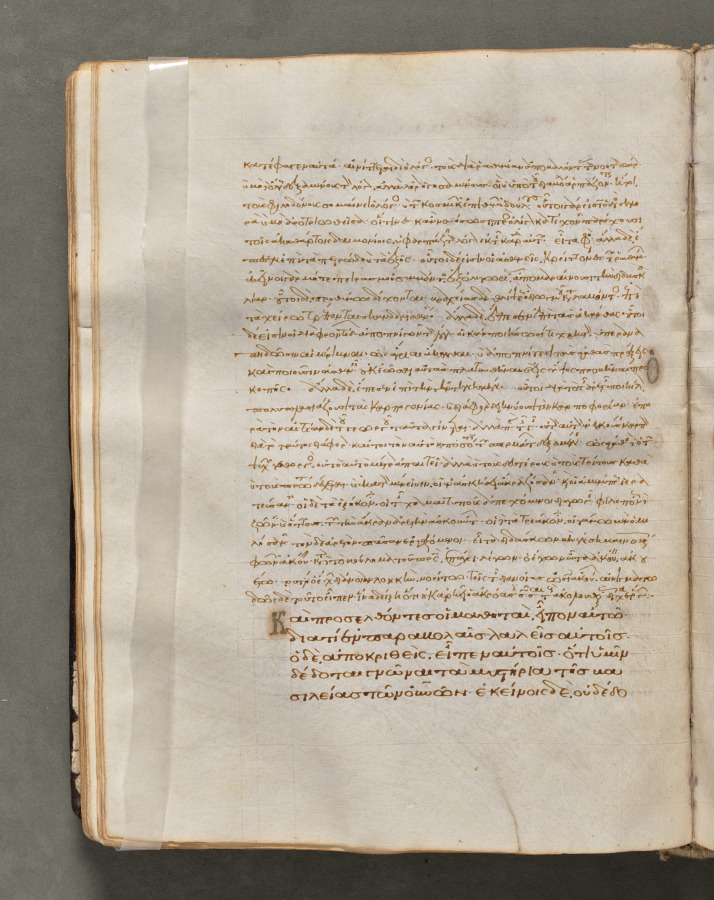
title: Text, folio 57 (verso), from a Gospel Book with Commentaries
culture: Byzantium, Constantinople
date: c. 1000–1100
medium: ink, tempera, and gold on vellum; leather binding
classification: Bound Volume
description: Each of the four gospels in this book opens on a page with brilliantly illuminated borders depicting the author of the text as well as birds-principally peacocks, symbols of the immortality of the soul-and fountains, representing the fountain of life and the salvation of the soul. This volume consists of 428 leaves with texts in Greek. Its level of sophistication suggests that it was probably written and decorated in a monastery in Constantinople.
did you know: Gospel Books were carried in procession through Byzantine churches.